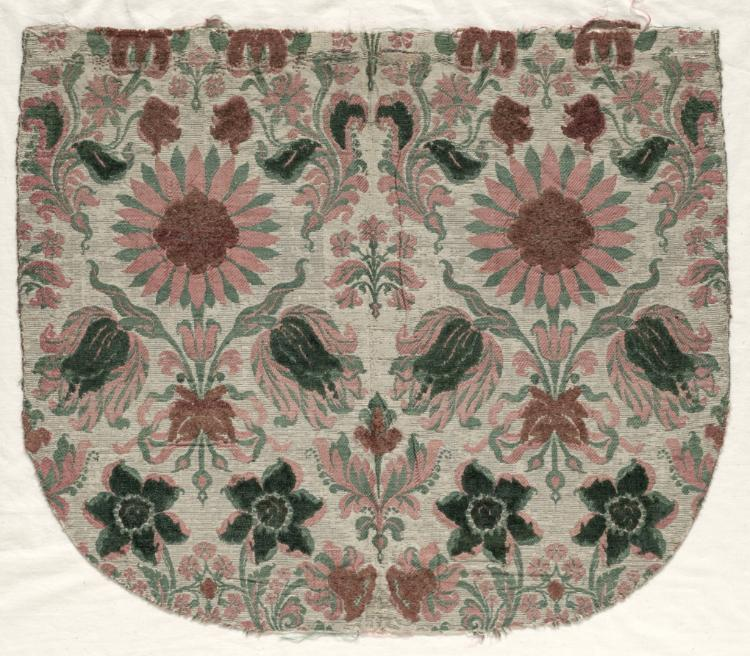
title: Chaperon (Hood)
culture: Spain, late 17th century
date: late 17th century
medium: silk and metal threads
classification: Textile